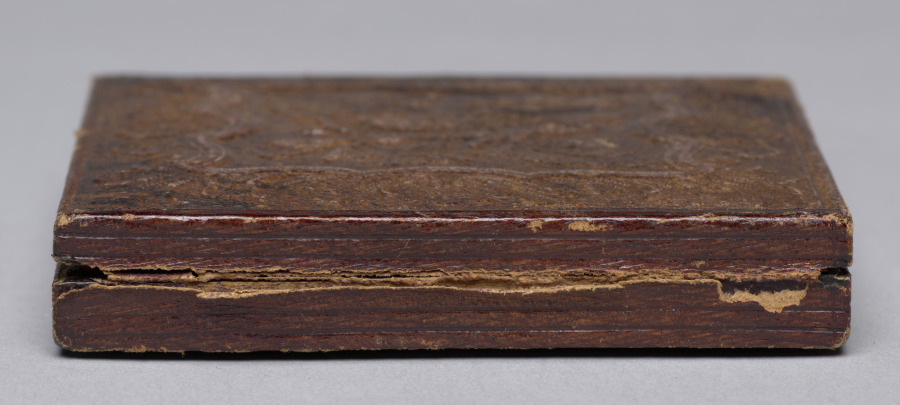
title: Black Woman and White Child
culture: America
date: c. 1855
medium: daguerreotype, sixth plate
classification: Photograph